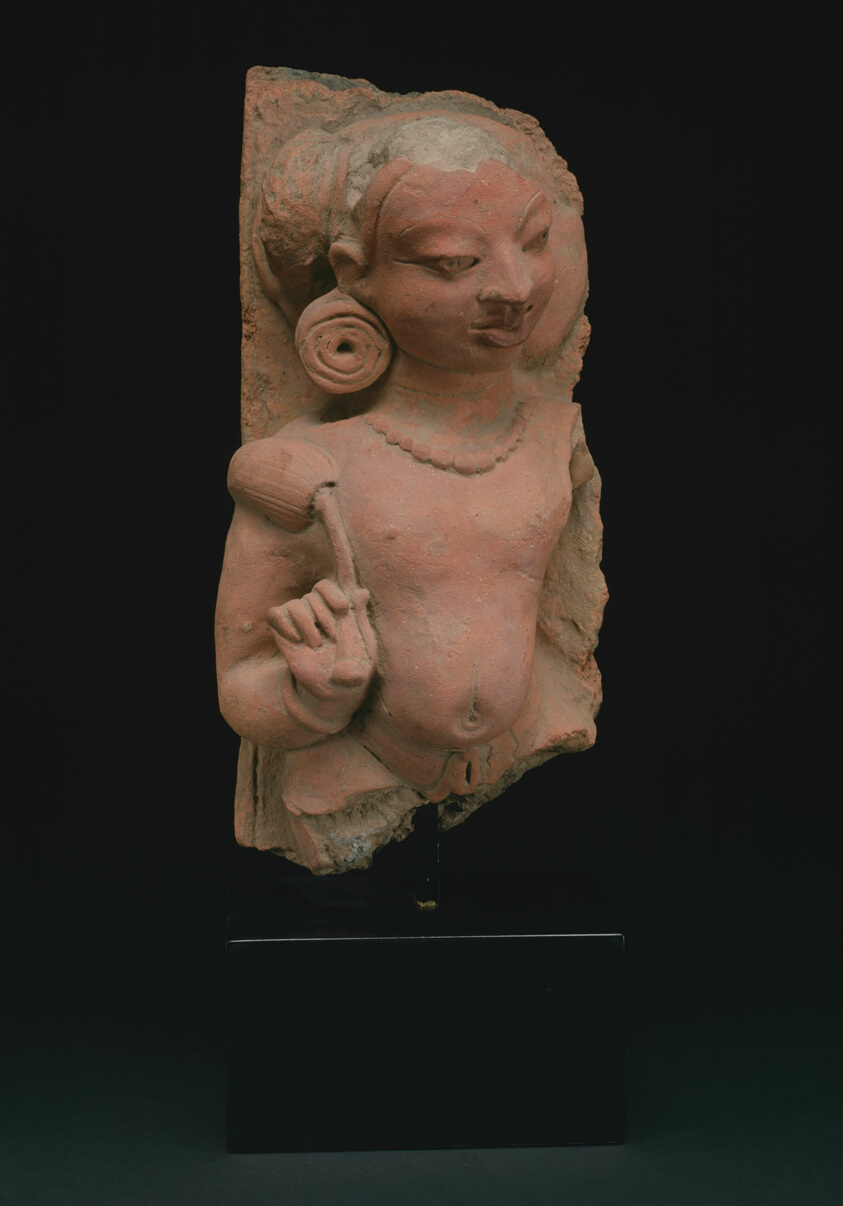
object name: Sculpture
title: Male Deity (Deva) Holding a Lotus Bud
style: South Asian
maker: India; Uttar Pradesh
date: Gupta period, 4th/5th century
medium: Terracotta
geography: Uttar Pradesh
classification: sculpture; asian art